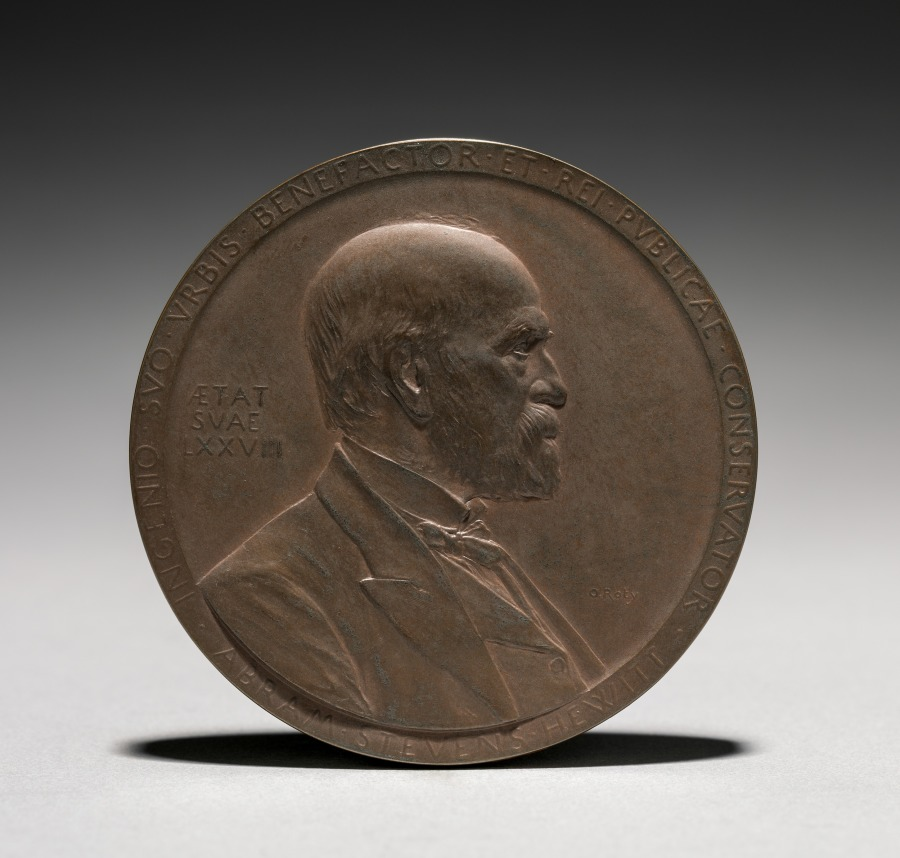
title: Medal: Abram Stevens Hewitt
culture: France, late 19th-early 20th century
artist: Louis-Oscar Roty (French, 1846–1911)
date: 1875–1925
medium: bronze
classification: Metalwork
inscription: obverse - "INGENIO . SVO . VRBIS . BENEFACTOR . ET . REI . PVBLICAE . CONSERVATOR . ABRAM STEVENS HEWITT"; left of portrait bust: "AETAT/SVAE/LXXVIII"; right of portrait bust: "© Roty." On edge: "Tiffany & Co." reverse - band of lettering around edge: "RAPID TRANSIT -- THE CHAMBER OF COMMERCE OF THE STATE OF NEW YORK, MDCCCC. On edge: "Tiffany & Co."